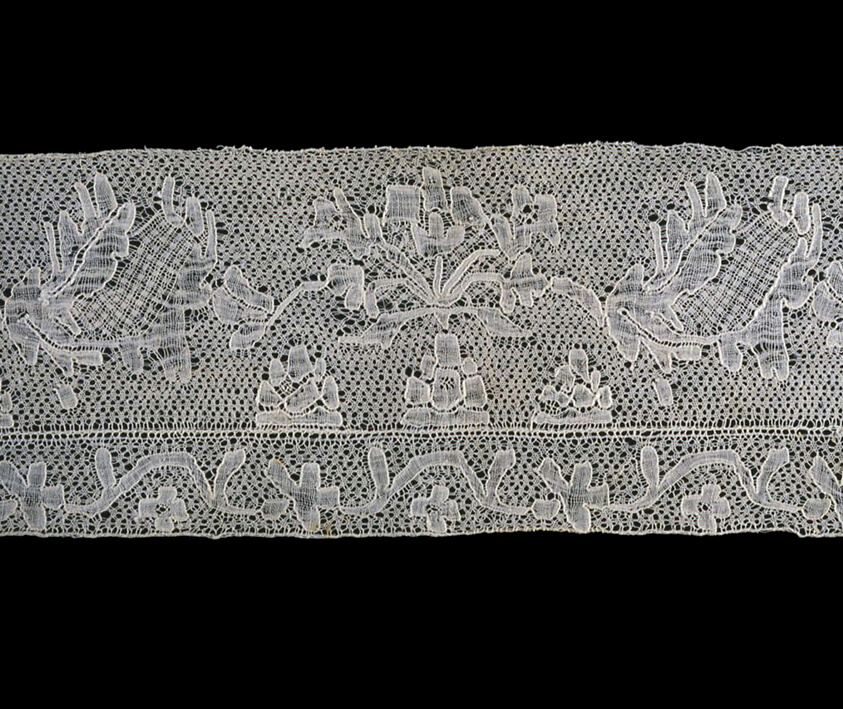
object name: Textile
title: Border (Fragment)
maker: Belgium, Flanders, probably Antwerp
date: 1725/75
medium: Linen, bobbin straight lace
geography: Flanders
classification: textile; lace - bobbin; lace